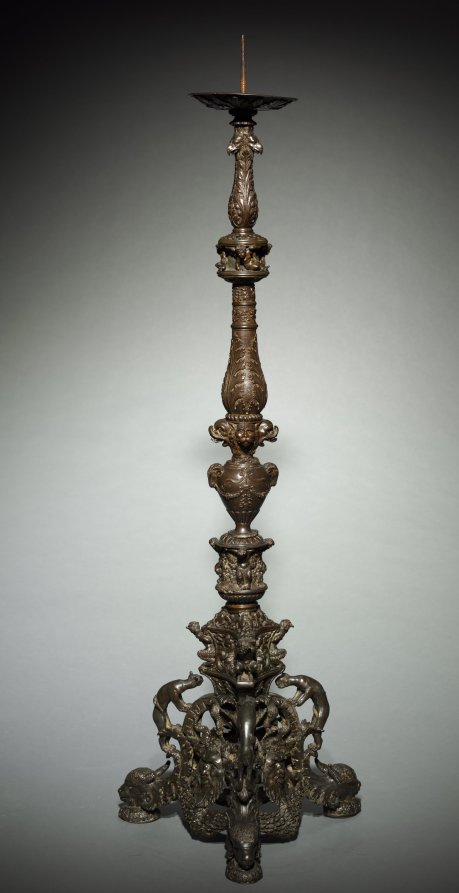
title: Paschal Candlestick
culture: Northern Italy, possibly Padua, 16th century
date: c. 1525–1550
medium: bronze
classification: Sculpture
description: In Roman Catholic practice, a large candlestick holds the Paschal Candle, blessed and lit for the first time on Easter eve, then used on significant occasions throughout the year. Despite its religious function, the decorations here are entirely secular-ranging from panthers and bound satyrs to the heads of raptors and goats. These elements derive from ancient Roman sculpture and were especially popular among intellectuals in northern Italy, who were actively exploring connections among pagan traditions, ancient philosophy, and Christianity.